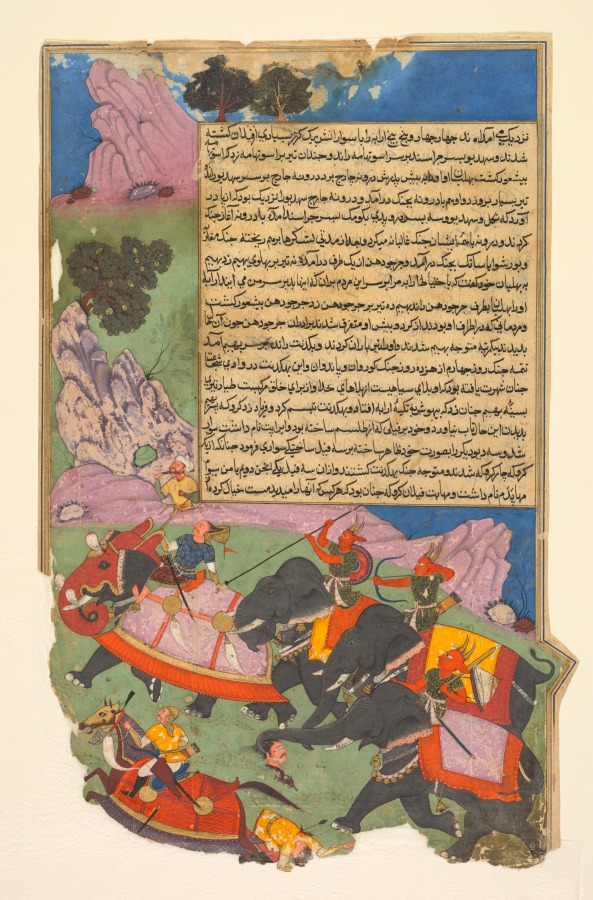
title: Ghatotkacha and three demons in his company chase Bhagadatta, from Bhishma-parva (volume six) of a Razm-nama (Book of Wars) adapted from the Sanskrit Mahabharata and translated into Persian by Mir Ghiyath al-Din Ali Qazvini, known as Naqib Khan (Persian, d. 1614)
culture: Mughal India, court of Jahangir (reigned 1605–27); made for Abd al-Rahim the Khan Khanan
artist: attributed to Fazl (Indian, active early 1600s)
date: 1616–17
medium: Gum tempera, ink, and gold on paper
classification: Painting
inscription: recto: Persian text in naskh script: . . . they were coming near, four four, five five chariots and their riders with one mace. Many elephants were killed. Sahadeva—the son of Jarasandha—drove toward Ashvatthaman and shot so many arrows at Ashvatthaman that Ashvatthaman lost consciousness. His charioteer took him to his father, Master Drona. Master Drona drove toward Sahadeva—the son of Jarasandha—and showered him with arrows; and he too began to wage battle against Drona. Master Drona was about to finish off Sahadeva when Nakula and three demons and three sons of Drupada came to the aid of Jarasandha’s son and began to fight with Master Drona, and Drona was fighting them all victoriously; and after some time the armies mingled together and became a battle for all, and Bhurishravas and Satyaki began to engage in fighting and Duryodhana came from a side and showered Bhima with nine arrows on the side. Bhima told his charioteer: “Drive my chariot carefully against these people for they are charging at me.” The charioteer drove his chariot toward Duryodhana. Bhima shot ten arrows at Duryodhana, and he lost consciousness, and ten brothers of Duryodhana were killed on this day, and the people who were around him scattered away and dispersed from around him. Duryodhana’s brothers, when they witnessed his plight turned at once toward Bhima and showered him with arrows, and Bhagadatta drove his elephant towards Bhima. The remainder of the fourth day from the eighteen days of battle between the Kauravas and the Paṇḍavas And this Bhagadatta had won such fame in the land of valor that he was deemed a black calamity amid calamities sent by God and for His creatures an instrument of swift death. He shot such an arrow at Bhima’s chest that he lost consciousness and fell leaning against the chariot. Bhagadatta grinned and shouted. Ghatotkacha, the son of Bhima, having witnessed this could no longer hold back and himself mounted an elephant he had made by talismanic means and was called Airavata and summoned three other demons, which he had made in his own image, and had them ride three elephants constructed by art, so that from one demon, four demons went toward Bhagadatta, fighting. And among those elephants, one was called Anjana, the second Vamana, and the third Mahapadma. And Ghatotkacha’s elephants had such an awesome presence that whoever saw them imagined them in rut and from [cont. on verso]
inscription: Verso: text of Ghatotkacha and three demons in his company chase Bhagadatta: Persian text in naskh script: [cont. from recto] them they would flee. Then the demon drove hard all four elephants toward Bhagadatta until they managed to roll him in their trunks and trampled on his elephant. He was shouting out of despair and seeking help. At this time Bhishma noticed him and shouted at his people to come quickly to Bhagadatta’s aid and save him before he expired. Master Drona, with a well-ordered line of troops and choice warriors, came to battle with the demon. And Bhishma had advised Drona that “This demon is in origin born of a demon, and his way of fighting is not like that of human beings, and he knows a great deal about talismans and magic; therefore, you should act cautiously, and in fact I advise you to cease battle with him today so that if he has indulged in talismans and magic, we too can devise trickeries and ruses of our own so that we gain victory over him tomorrow, for as they say, one should treat like with like.” And the advice of the Kauravas was similar to that of Bhishma. But nevertheless Master Drona set out to free Bhagadatta. Back to the story: when Yudhisthira saw that Master Drona had come to fight the demon in order to free Bhagadatta, he came to the aid of the demon who now was fully backed and supported and who bellowed out joyously: “Now that a massive army has come to my aid, where can you take your life to escape from me?” He said this and left Bhagadatta in order to face Drona. Drona remembered Bhishma’s words and thought it inadvisable to fight the demon. Meanwhile, night was drawing close, and so he pulled back his reins, and accompanied by the Kauravas, returned to their tents. When the Pandavas saw that the Kauravas had ceased fighting and returned to their quarters, they too turned their reins toward their tents and returned homeward with cheer and joy and would slap the demon on the back and express their praise and approval. When night fell, Duryodhana came to Bhishma and summoned all the notables and commanders of the Kauravas and said in a woeful and regretful manner: “Having reviewed and examined today’s battle, I have become extremely despondent and despair of you people. Each one of you has the power and strength to tackle an entire body of troops, and it is clear how much power the demon wields. It is a wonder to me that today too you had agreed together to take it easy and ride out the day and were not capable of countering him, and you have gathered your troops and come home. These actions of yours suggest that either you are not loyal to and bonded with me, or that you just lack strength. How can we believe the latter hypothesis? So we are left with the first hypothesis. So please explain so that I can arrive at another solution.” Bhishma responded to this on behalf of all of them, and said: “Although if you hear the truth from me or from any other person, you will not deem it acceptable, nevertheless since you have posed the question, one must respond out of necessity. I told you at the beginning and tell you again now that Pandavas belong to another breed of people, and overcoming them is no business of yours or ours, for since they have overcome Indra, and Madhu the demon has gained credit from them and taught them magic and sorcery, it would be impossible for the king to overcome them in battle. At most what we are capable of is to indulge in some skirmishes with them and play for time and try to save ourselves from their calamity. Therefore, it would be fitting if you would now see reason and make peace with them on their terms since nothing has yet happened, and the door to reconciliation is open, and what Madhu the demon has related of Krishna and Arjuna––he has said that these two are the Nara and Narayana of the time––you have . . .”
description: The red demons riding elephants were magically generated in multiples by Ghatotkacha, the son of one of the protagonists of Book of Wars. Though created by magic, the elephant-riding demons still caused problems for their adversaries and forced them to retreat. This scene took place on the fourth of 18 days of heated battle. The Mughal emperor Akbar (reigned 1556–1605) commissioned a translation of the ancient Sanskrit epic Mahabharata into the Mughal court language of Persian and distributed copies to members of his court. He believed that the epic provided insight into how to rule the people of India. The chief minister to both Akbar and his successor, Jahangir, commissioned his own lavishly illustrated copy, from which this page has come.